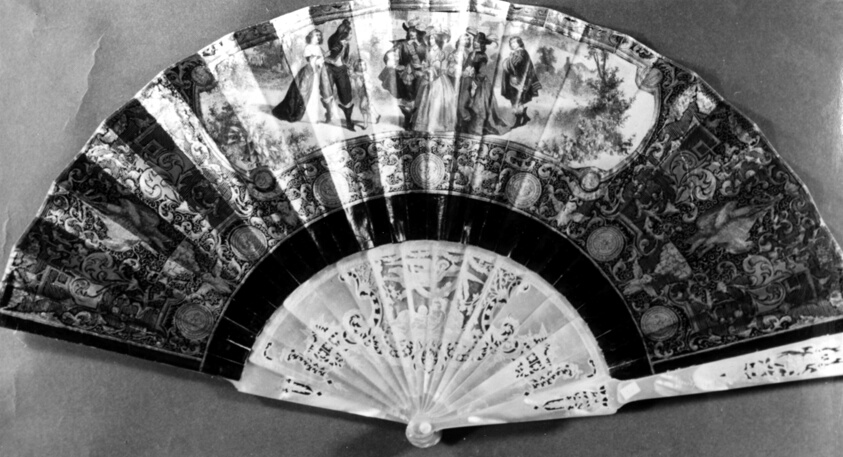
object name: Costume and Accessories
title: Fan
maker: Italy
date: 19th century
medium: Carved pearl sticks and guards; gold paper mount with Italian rococo style background with lithograph scene in center; sticks are pierced and carved with designs of folliage and putti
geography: Italy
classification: textile; fan - paper; costume accessory - folding fan; costume